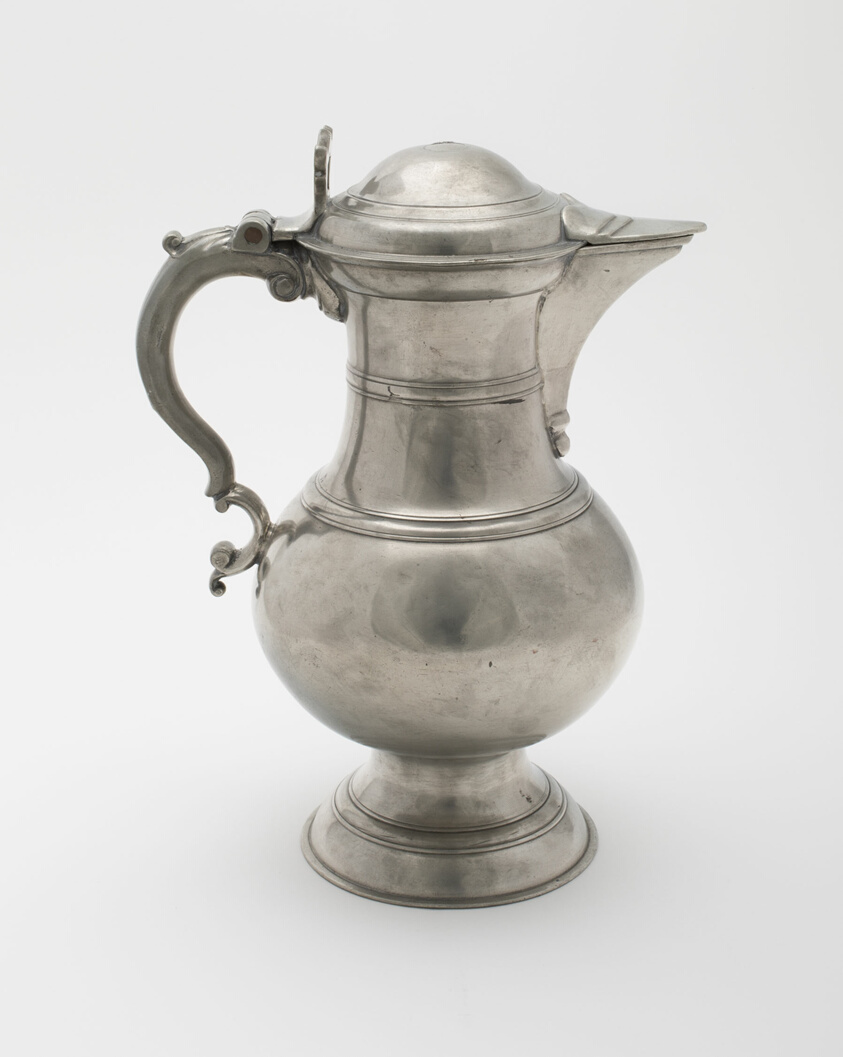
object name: Decorative Arts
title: Flagon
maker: Attributed to William Will; American, born Germany, 1742–1798; Philadelphia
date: 1765–80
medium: Pewter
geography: Philadelphia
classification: vessel for serving drinks; metalwork; american decorative arts; american arts; decorative arts